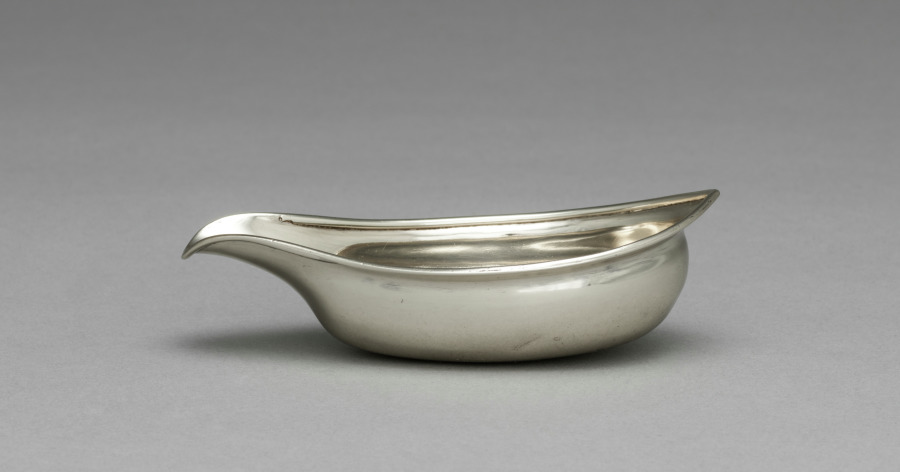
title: Pap Boat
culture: America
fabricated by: Cary Dunn (American, 1798)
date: c. 1790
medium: silver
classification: Silver